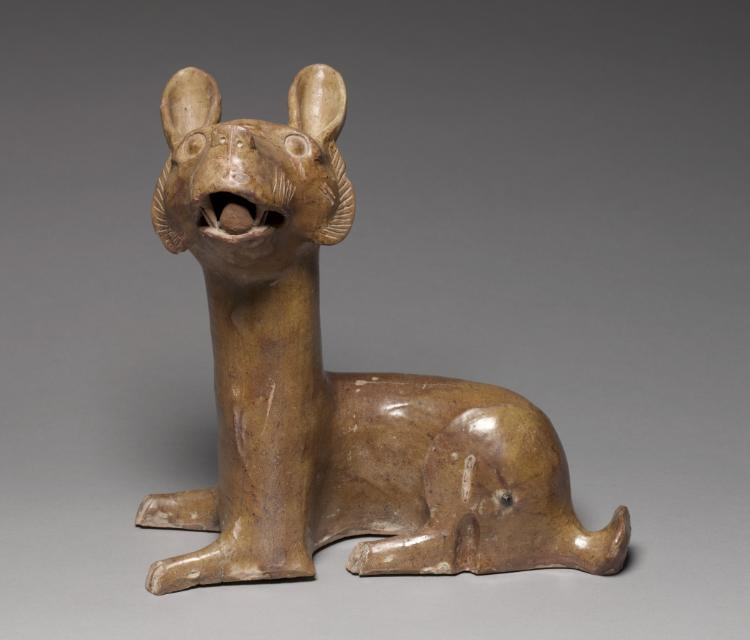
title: Dog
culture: China, Eastern Han dynasty (25–220 CE)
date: 25–220 CE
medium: earthenware with lead glaze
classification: Sculpture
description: Modeled with a lively naturalism and light humor, this dog reflects the worldly tastes of Han China. It differs from the solemn animal images on ritual bronze vessels, which served as the medium for communication with the supernatural realms. The Han people held beliefs in a worldly paradise and an otherworldly realm of eternal life and happiness.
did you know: The dog's muzzle, whiskers, and neck scruff were boldly incised into the earthenware form.